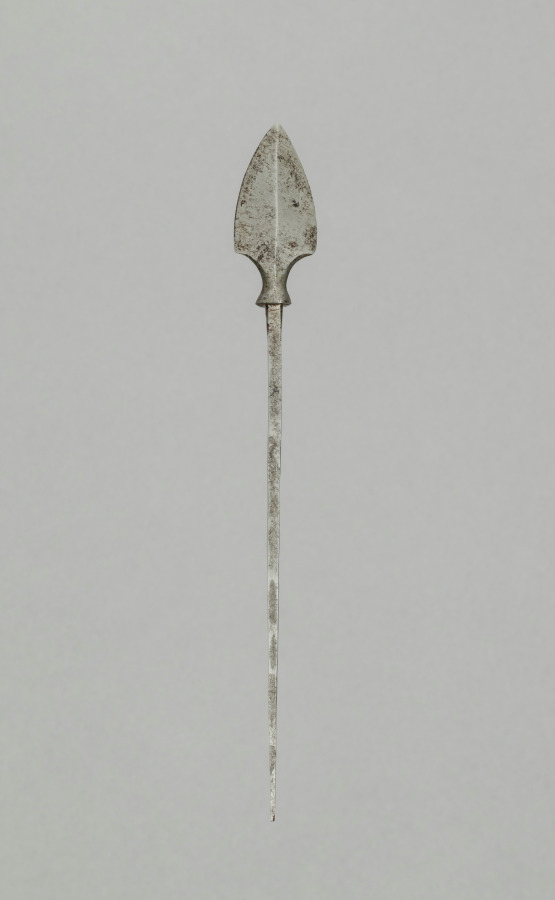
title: Arrow Point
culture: Japan, Edo period (1615–1868)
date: 1700s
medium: steel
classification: Arms and Armor